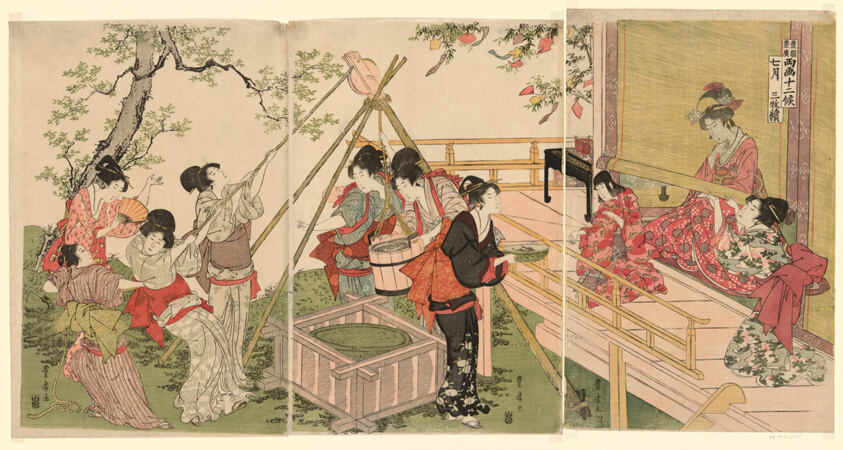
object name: Print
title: The Seventh Month, from the series The Twelve Months by Two Artists (Ryoga juni ko)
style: Japanese (culture or style)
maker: Utagawa Toyohiro (Japanese, 1773-1828)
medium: Color woodblock prints; oban triptych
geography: Japan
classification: woodblock print; print; asian art